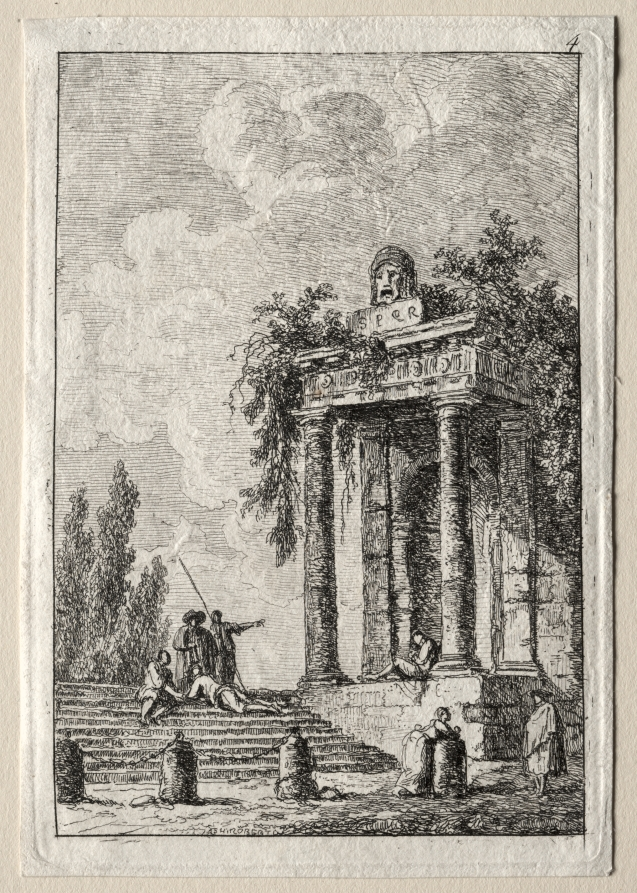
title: Les Soirées de Rome: L'Escalier aux quatre bornes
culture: France, 18th century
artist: Hubert Robert (French, 1733–1808)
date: 1763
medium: etching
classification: Print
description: Derived from his own pen-and-ink drawings, this suite of etchings features fictional characters situated near recognizable buildings and statues in Rome. On the title page, Robert dedicated the suite to Marguerite Le Compte, who visited Rome in 1764 in the company of the wealthy author and art enthusiast Claude Henri Watelet. Both Le Compte and Watelet were amateur etchers, and they socialized with a group that included artists and printmakers centered at the academies in Italy. Robert’s dedication was likely motivated by the hope of future patronage from Le Compte. She may be the generous woman with a hand muff depicted in The Ancient Temple, the fifth scene in this series.